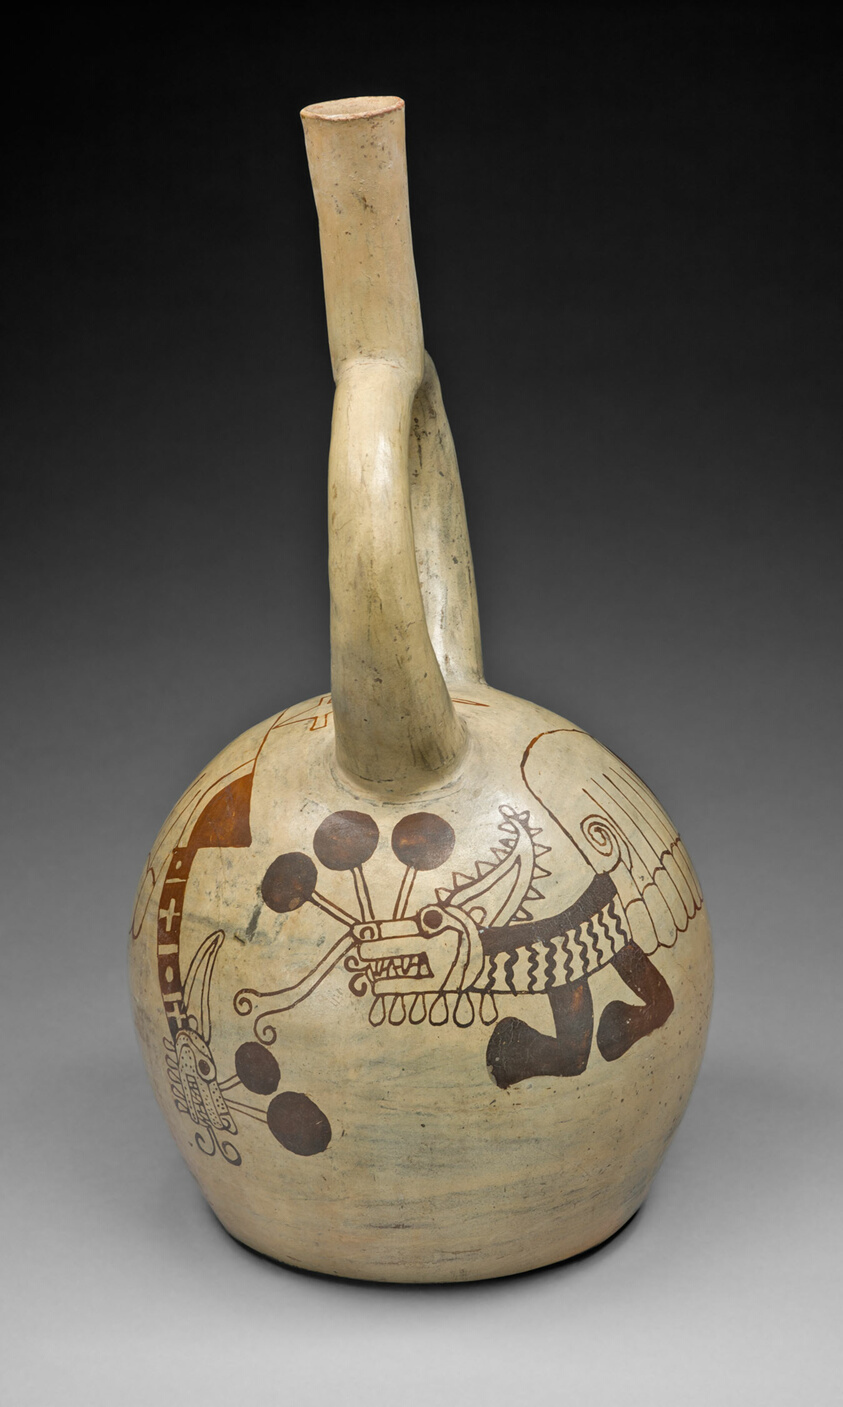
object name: Vessel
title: Stirrup Vessel Depicting a Supernatural Being within a Shell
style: moche, Arts of the Americas, andes, south american, andean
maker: Moche (North coast, Peru)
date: 100 BCE–500 CE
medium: Ceramic and pigment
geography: Peru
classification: earthenware; ceramics; vessel; art of the americas